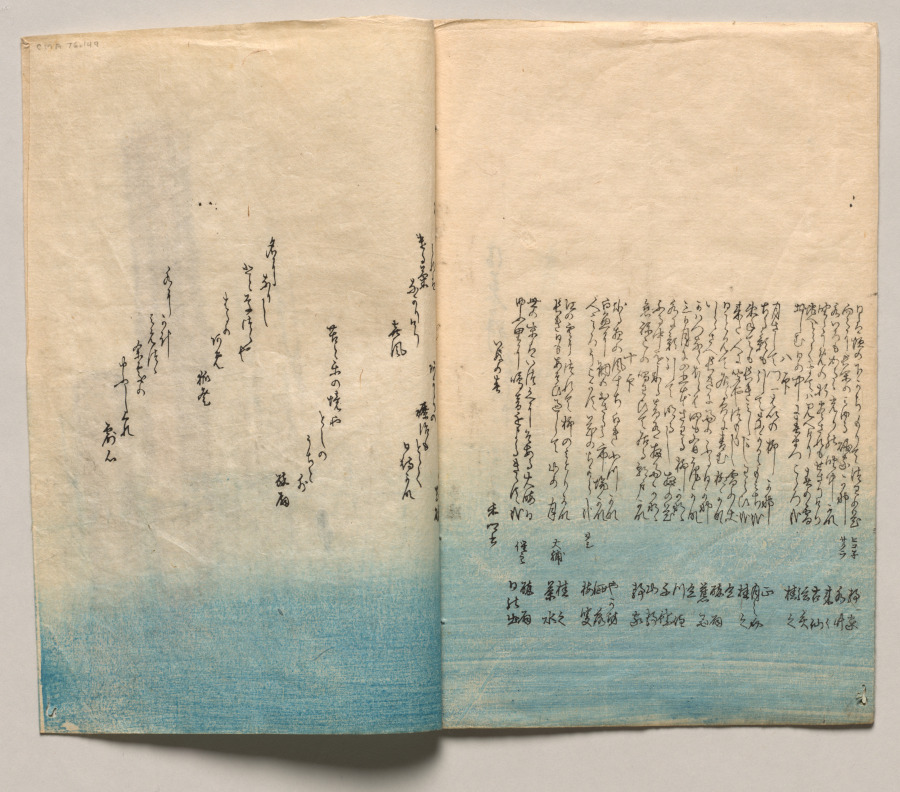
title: Spread Four from Verses for Winter and Spring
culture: Japan, Edo period (1615–1868)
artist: Utagawa Hiroshige (Japanese, 1797–1858)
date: 1850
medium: Woodblock printed book; ink and color on paper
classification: Bound Volume